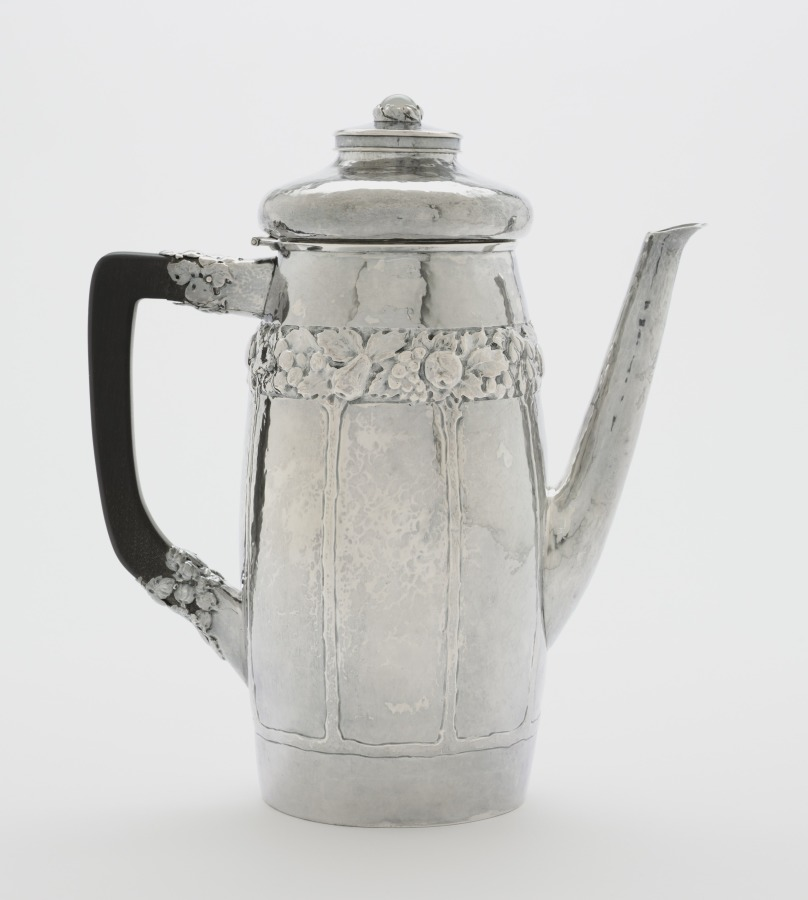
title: Coffee Pot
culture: America, Ohio, Cleveland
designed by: Louis Rorimer (American, 1872–1939)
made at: and Rokesley Shop (American)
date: c. 1910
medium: silver, moonstones, ebony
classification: Silver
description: This tea and coffee service was designed for production by the Rokesley Shop, a collaborative group working at Louis Rorimer’s studio. Reacting against industrial mass production, Rorimer emphasized inventive design in finely crafted objects.